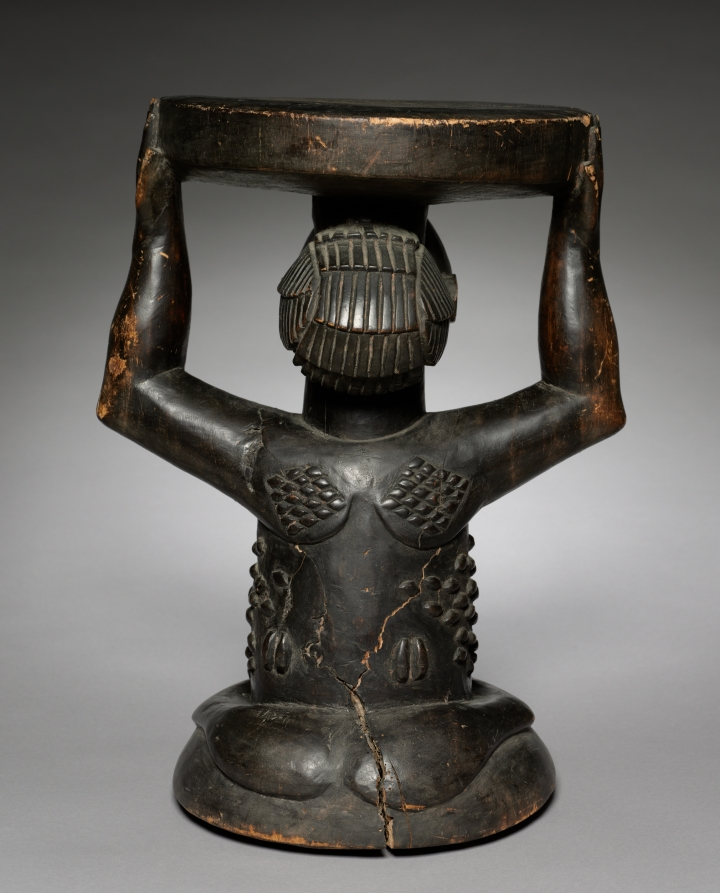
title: Caryatid Stool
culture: Africa, Central Africa, Democratic Republic of Congo, Luba-style carver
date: c. 1900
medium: wood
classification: Furniture and woodwork